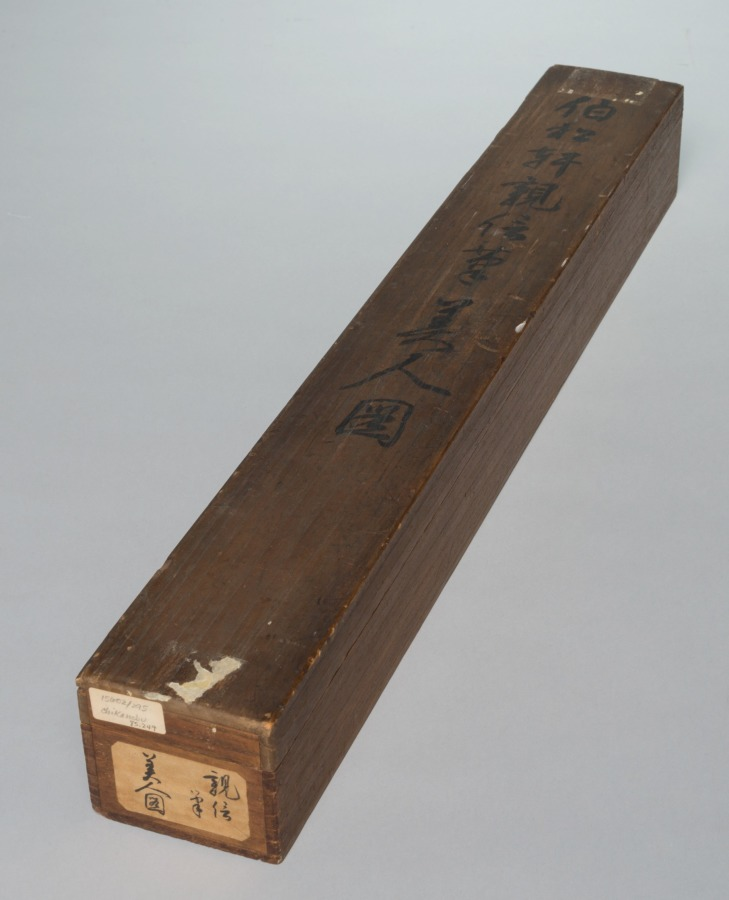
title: Courtesan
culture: Japan, Edo period (1615–1868)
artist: Matsuno Chikanobu (Japanese, active 1716–35)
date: 1716–35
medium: hanging scroll; ink and color on paper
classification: Painting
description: A glamorous courtesan sports an outer robe decorated with large roundels featuring plant motifs including iris and bush clover. Little is known about the life and artistic training of the painter Matsuno Chikanobu, an ukiyo-e artist who painted in a style strongly reminiscent of that of the Kaigetsudō studio. Many of his known paintings are on silk, and executed with high quality pigments, indicating that his primary clientele were wealthy individuals.